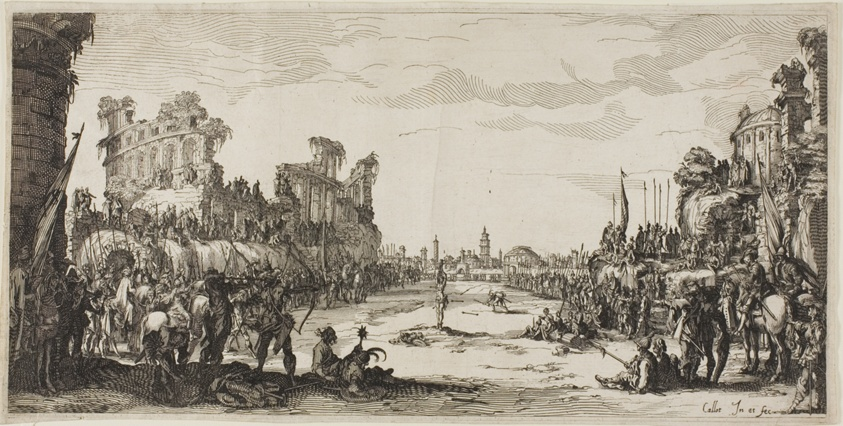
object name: Print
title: The Ordeal by Arrows (Saint Sebastian)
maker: Jacques Callot (French, 1592-1635)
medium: Etching on paper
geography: France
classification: etching; print; prints and drawing